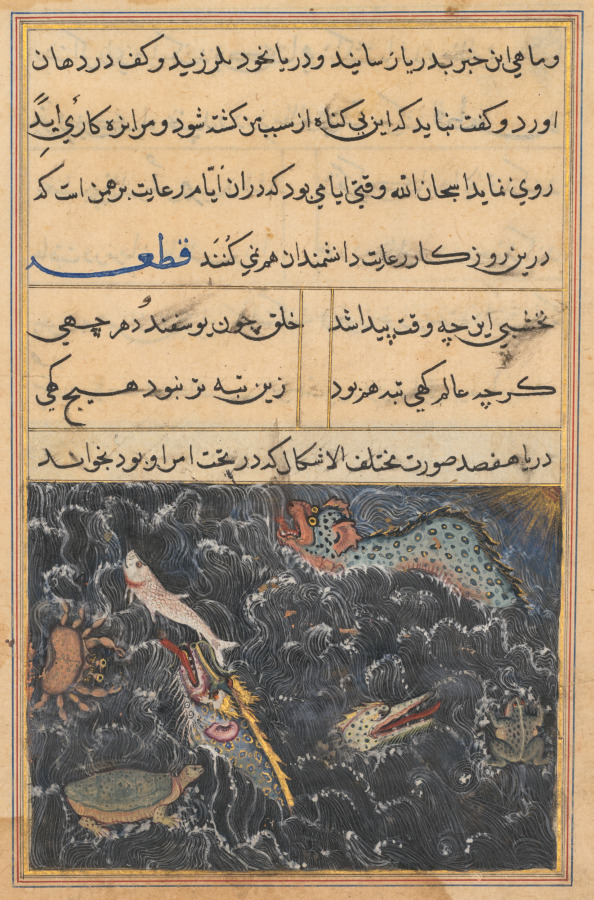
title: The creatures of the sea are asked by the king of the Ocean to take a message to the Brahman, from a Tuti-nama (Tales of a Parrot): Eleventh Night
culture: Mughal India, court of Akbar (reigned 1556–1605)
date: c. 1560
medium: gum tempera, ink, and gold on paper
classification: Painting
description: The creatures of the sea, by turn, refuse to convey the king of the ocean’s acceptance of the wedding invitation to the Brahman. The sea dragon in the upper right is concerned that he will frighten people, so he volunteered the whale. The whale said that he has no legs to walk on land, so volunteered the turtle. The turtle said he would be too slow and would never make it on time. The crab feared he would not be taken seriously, and the crocodile said that he is too rough and vulgar for the job. The frog agreed to go.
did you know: The sea dragon is chief of the many species under the Ocean King’s command.